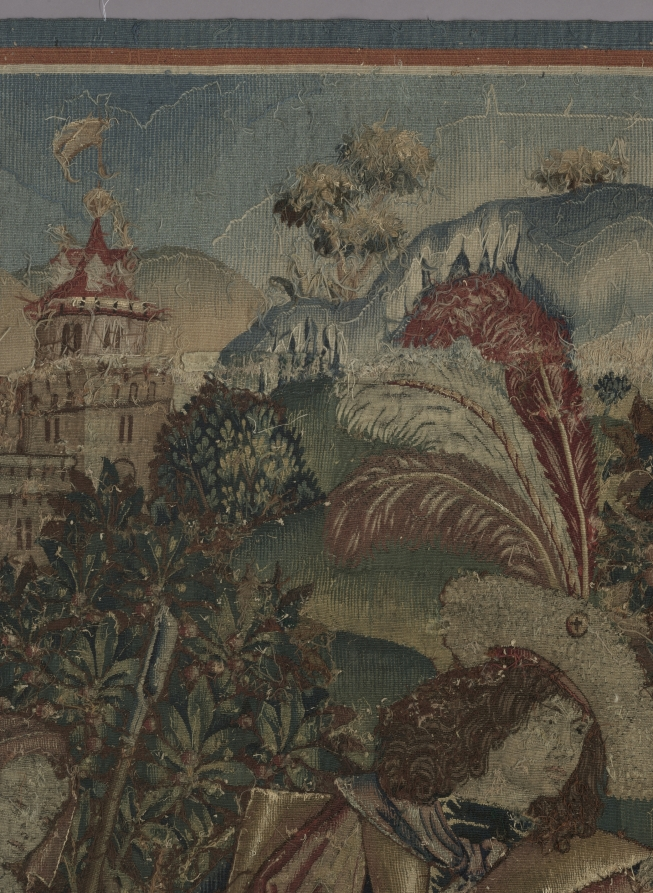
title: Shepherds in a Round Dance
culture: Netherlands, early 16th century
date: around 1500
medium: Wool and silk: tapestry weave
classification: Tapestry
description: Late medieval tapestries often use a limited yet contrasting color palette to portray stylized images. The expressions of these figures, for example, are conveyed more by their postures than by their faces. Four shepherds and shepherdesses join hands and dance to the music of a bagpiper at the far right, while a lord and two ladies on the left look on. A dog and sheep amid blossoming plants and trees contribute to the festive pastoral scene in front of a castle.